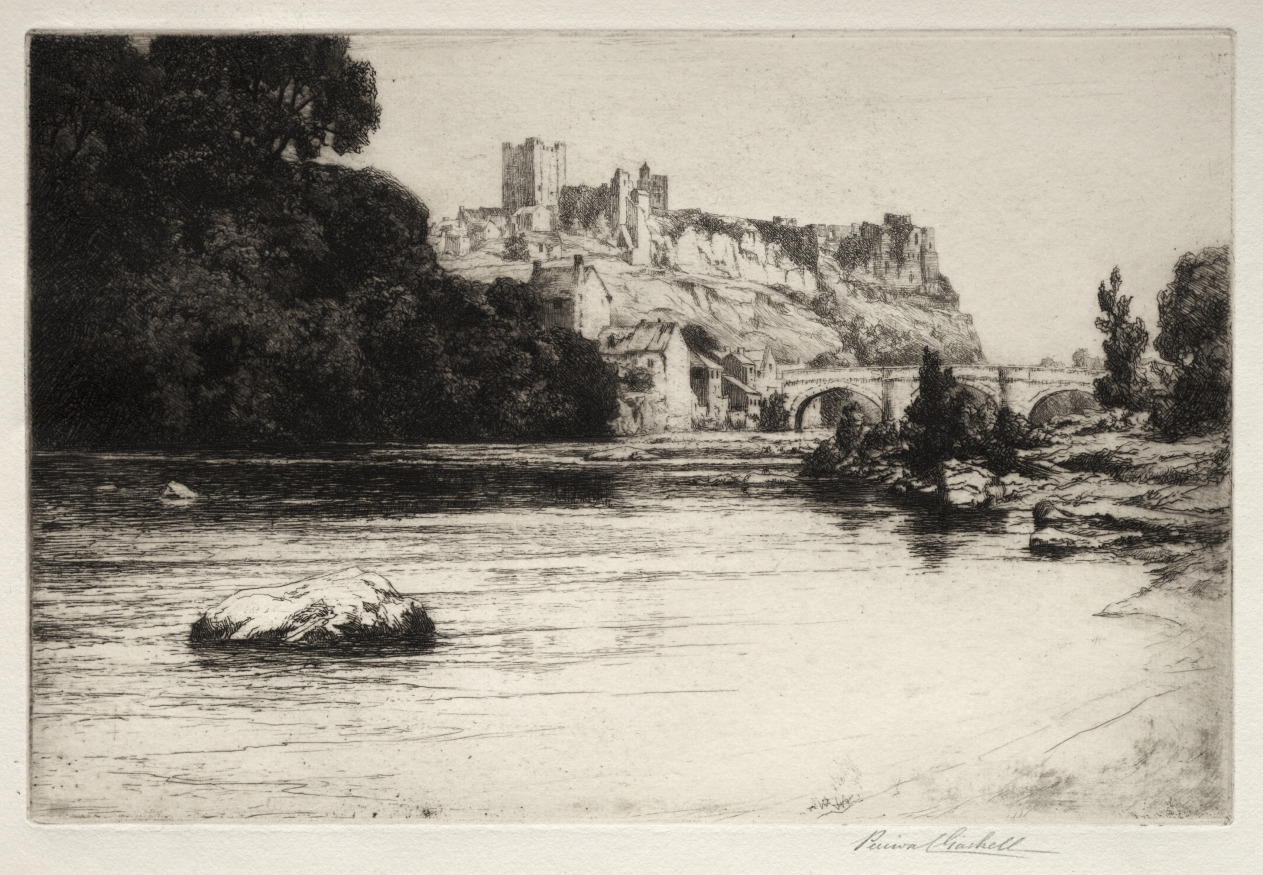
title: Richmond Castle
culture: England, 19th-20th century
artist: George Percival Gaskell (British, 1868–1934)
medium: etching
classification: Print